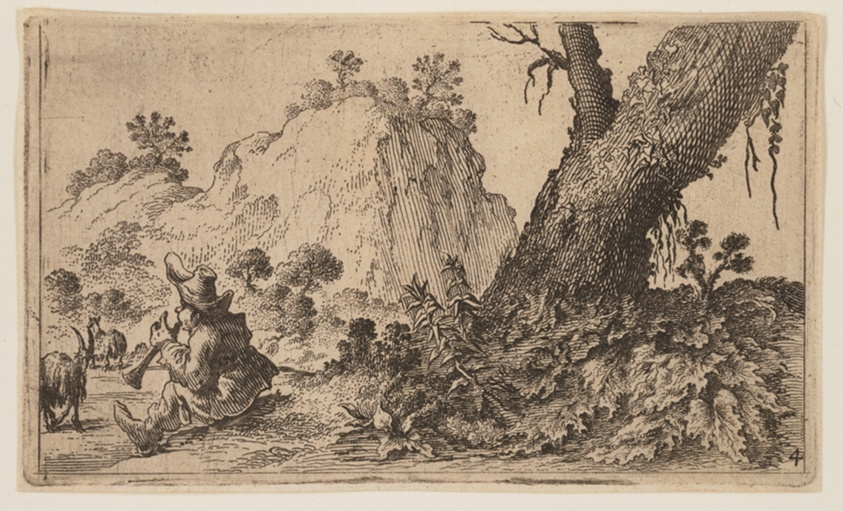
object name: Print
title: Shepherd Playing a Recorder to a Flock of Goats, from Twelve Landscapes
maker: Gillis van Scheyndel (Dutch, 1595–1660)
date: c. 1605-1650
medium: Etching on ivory laid paper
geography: Netherlands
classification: etching; paper; print; prints and drawing